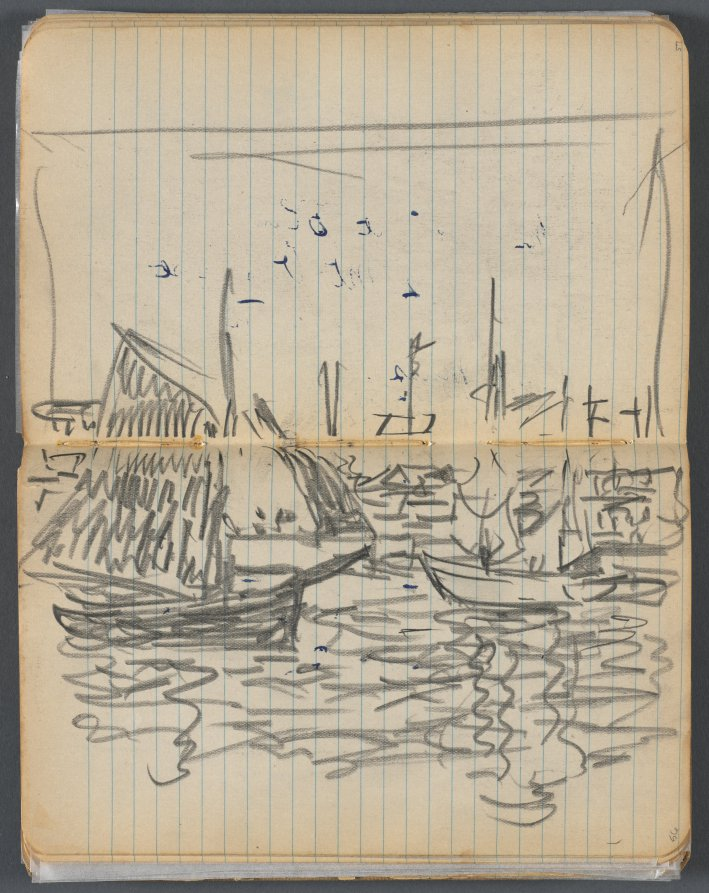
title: Sketchbook, page 056 &57: View of Sailboats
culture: America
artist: Maurice Prendergast (American, born Newfoundland [now Canada], 1858–1924)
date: 1905–10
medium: graphite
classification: Bound Volume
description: This sketchbook contains 69 pages of drawings, a diary largely devoted to the state of the artist's health, and a three-page discourse on the nature of genius and ideas.